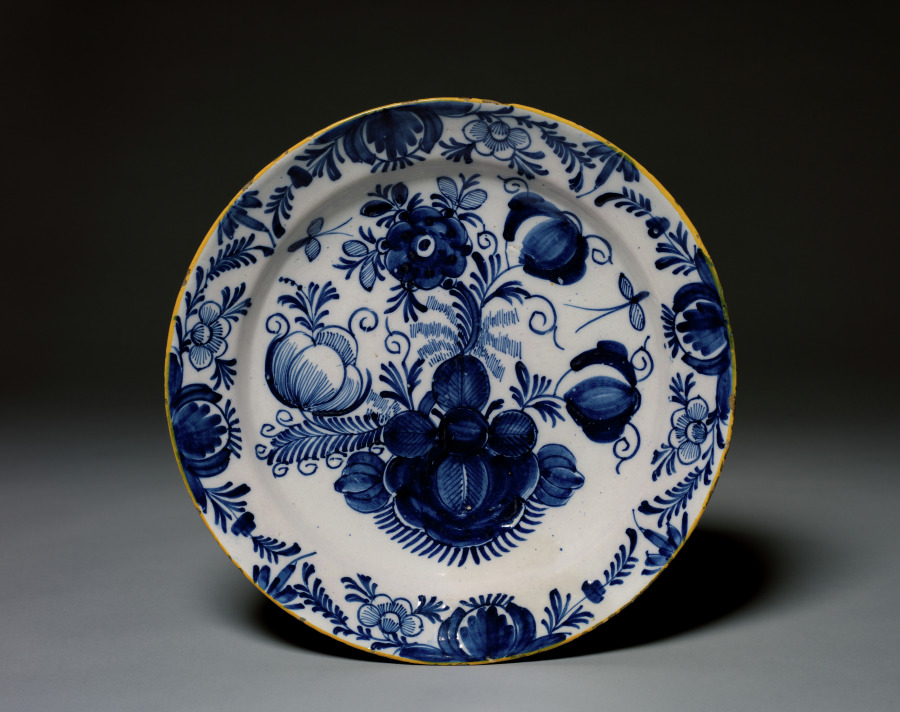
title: Delftware Plate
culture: Netherlands, Holland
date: c. 1750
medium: glazed ceramic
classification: Ceramic